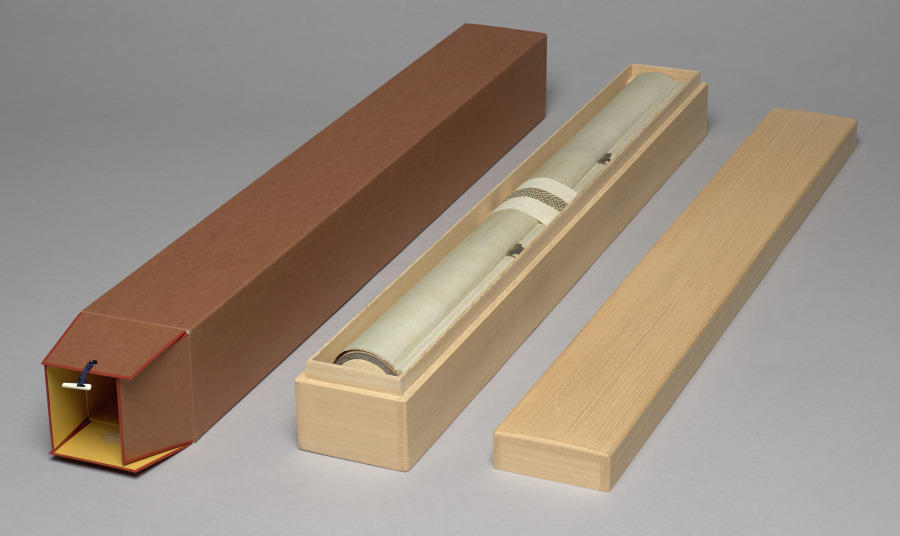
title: Operating on Guan Yu's Arm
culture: Japan, Edo period (1615–1868)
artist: Katsushika Ōi (Japanese, c. 1800-after 1857)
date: 1840s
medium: hanging scroll; ink, color, and gold on silk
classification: Painting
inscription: 款記「應為栄女筆」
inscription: 「葛しか」白文方印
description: Ukiyo-e artists’ subject matter extended to popular literature. Katsushika Ōi used color to great effect in her gruesome version of an episode from a 14th-century Chinese novel, Romance of the Three Kingdoms. Ōi portrayed the passage in which legendary 3rd-century military leader Guan Yu undergoes a bone scraping to remove poisons received from an arrow wound. In this sensationalist portrayal, Guan Yu’s attendants cower at the sight of his bloody arm while he remains unflinchingly focused on his game. As a woman, Ōi was an outlier in her era, but her talent was allowed to shine due to collaboration with her father, Katsushika Hokusai (1760–1849), the famed designer of the print known as The Great Wave.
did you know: This is the largest surviving painting by the artist.